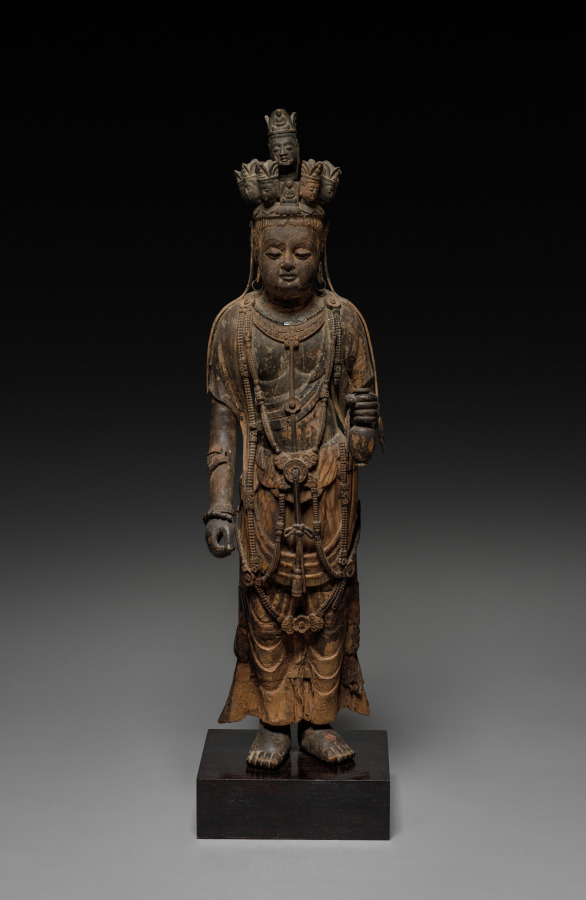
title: Eleven-Headed Guanyin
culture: China, Tang dynasty (618–907)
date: late 600s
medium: wood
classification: Sculpture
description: Guanyin, the bodhisattva of infinite compassion, can be identified by his attributes, carrying a tiny Amida Buddha in his crown, and holding a bottle with the nectar of life in his left hand. The eleven-headed Guanyin, in particular, has his eyes and ears open in all directions to hear, see, and help all those who are in distress. The garment and jewelry of this graceful figure remind us that the historic Buddha Shakyamuni was originally an Indian prince before he reached enlightenment. Upon his death, he entered nirvana, an eternal state free of desire and suffering, outside the realm of birth, death, and rebirth. The dating and attribution of the figure as being from China needs further study.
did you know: The sculpture was made of different types of wood with different grain sizes and patterns, which are connected with wood pegs and glue.